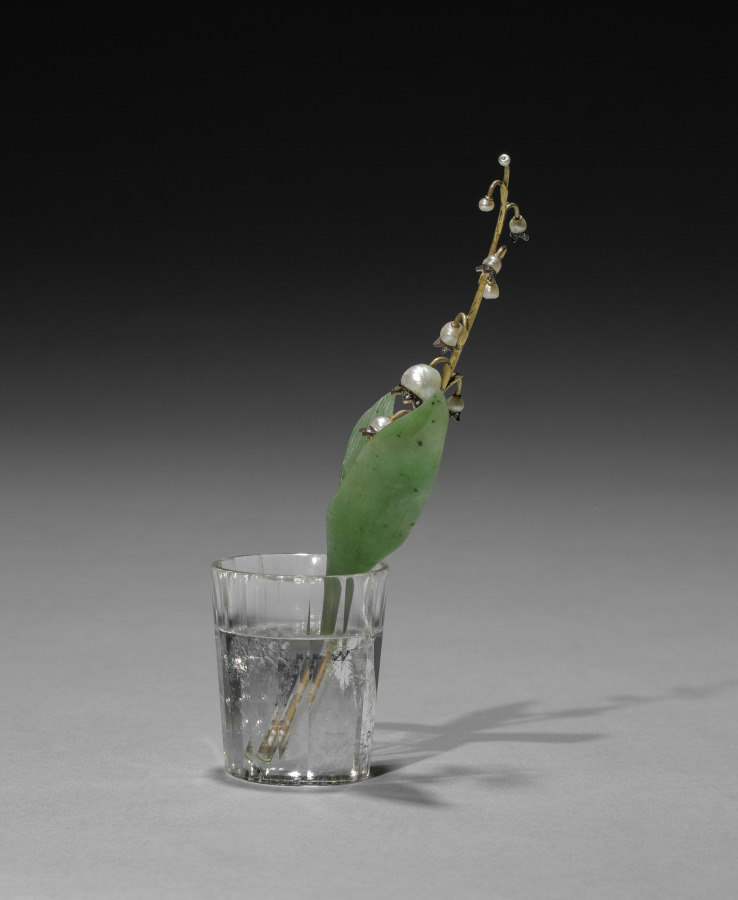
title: Flower Study of a Lily of the Valley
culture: Russia, St. Petersburg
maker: House of Fabergé (Russian, 1842–1918)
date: c. 1885–1915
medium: pearls, diamonds, jade, rock crystal, silver, gold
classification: Miscellaneous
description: This flower study resembles a stem of lily-of-the-valley. Fabergé’s inspiration for his flower studies is said to have come from the floral brooches of precious stones that were made in the 1700s for Catherine the Great as well as from the Japanese art of flower arranging, known as ikebana. Small and delicate, Fabergé’s flower studies were given as intimate gifts to friends by the tsarina and others in the court. She also liked to take them around to wherever the imperial family was residing as a reminder of spring during the harsh Russian winters.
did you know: The stems of Fabergé’s flower studies are set into little basins carved from rock crystal to resemble pots of water.